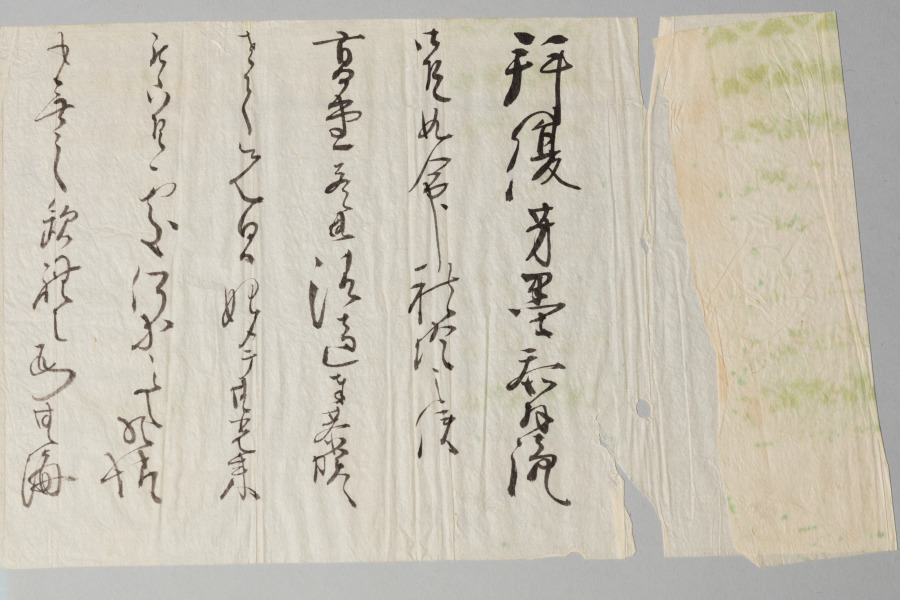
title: Landscape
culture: Japan, Edo period (1615–1868)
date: early 1600s to mid-1800s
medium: hanging scroll; ink on paper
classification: Painting